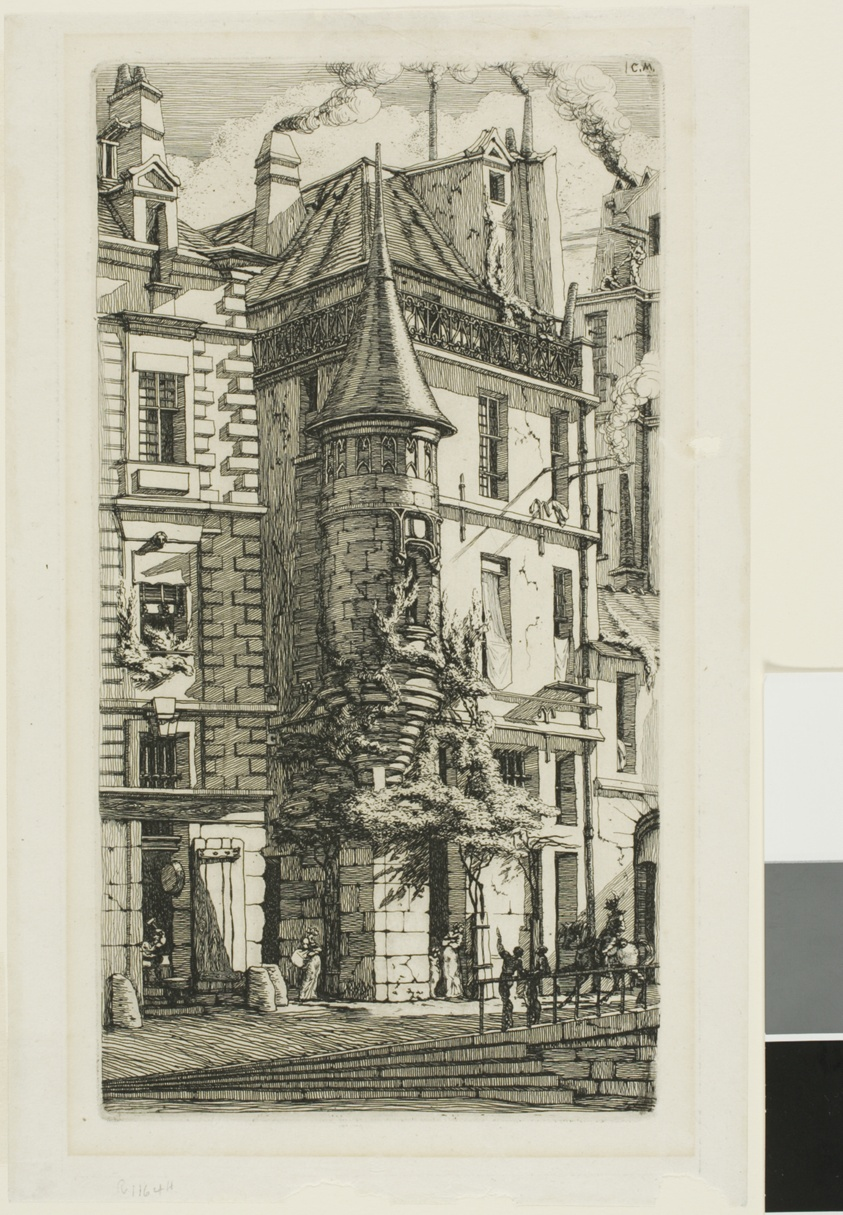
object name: Print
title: House with a Turret, rue de la Tixéranderie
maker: Charles Meryon (French, 1821-1868)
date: 1852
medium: Etching on tan laid paper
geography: France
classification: etching; print; prints and drawing